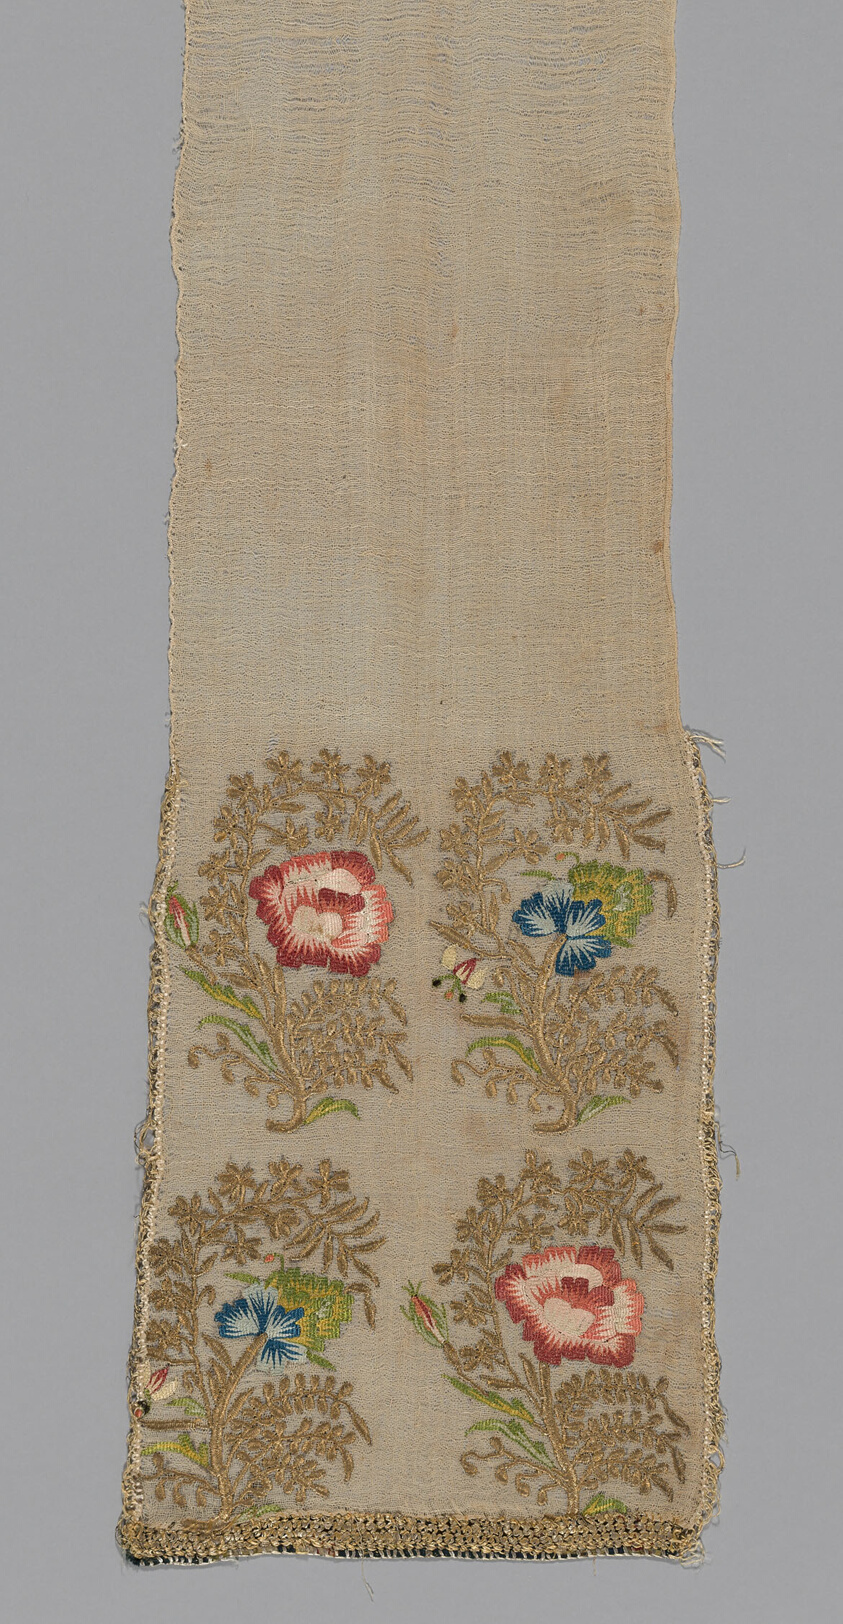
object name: Costume and Accessories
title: Sash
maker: Turkey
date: 18th century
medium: linen(?), plain weave; embroidered with silk and gilt-metal-strip-wrapped silk in long and short, stem, fishbone, and satin stitches; applied gilt-metal-strip-wrapped silk edging at warp ends; silk and gilt-metal-strip-wrapped silk buttonhole variation edging along weft edge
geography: Turkey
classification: textile; needlework (visual works); weaving; costume